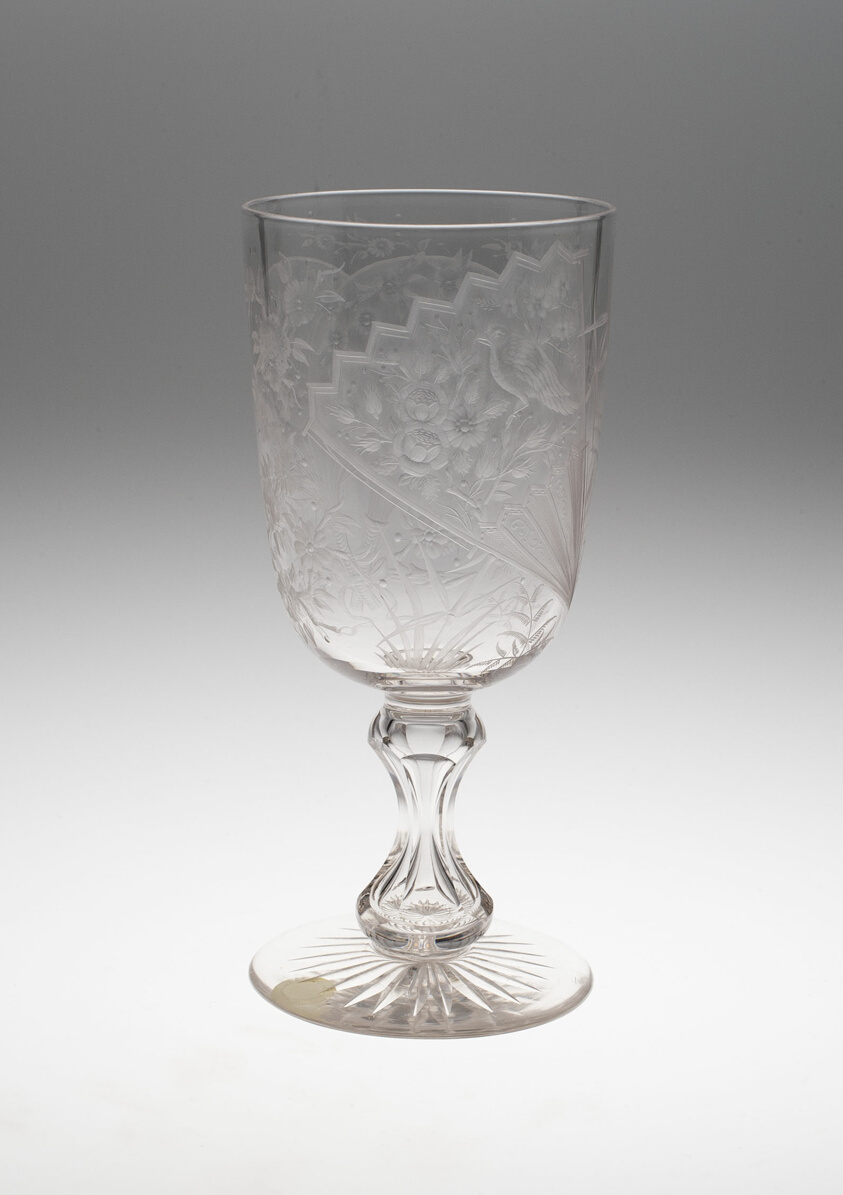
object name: Glass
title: Tall Goblet or Vase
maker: England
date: c. 1875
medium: Glass; engraved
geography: England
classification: vase; vessel; glass; european decorative arts